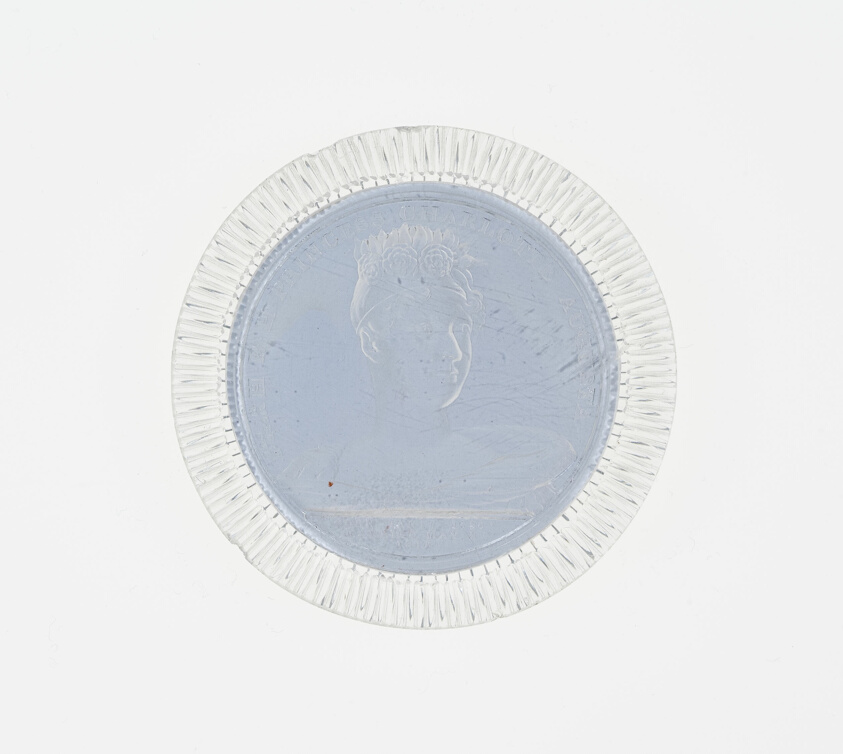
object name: Glass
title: Paperweight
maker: England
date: c. 1846–55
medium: Glass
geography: England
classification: paperweight; glass; european decorative arts